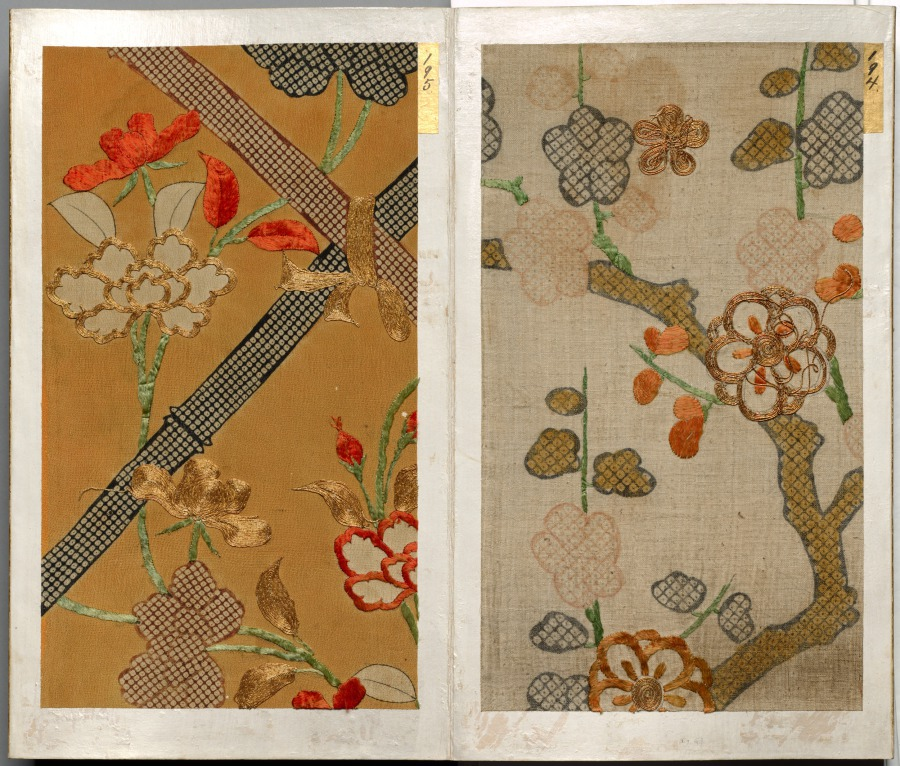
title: Album of Textile Samples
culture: Japan, Edo period (1615–1868)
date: 1600s-1700s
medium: silk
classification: Textile